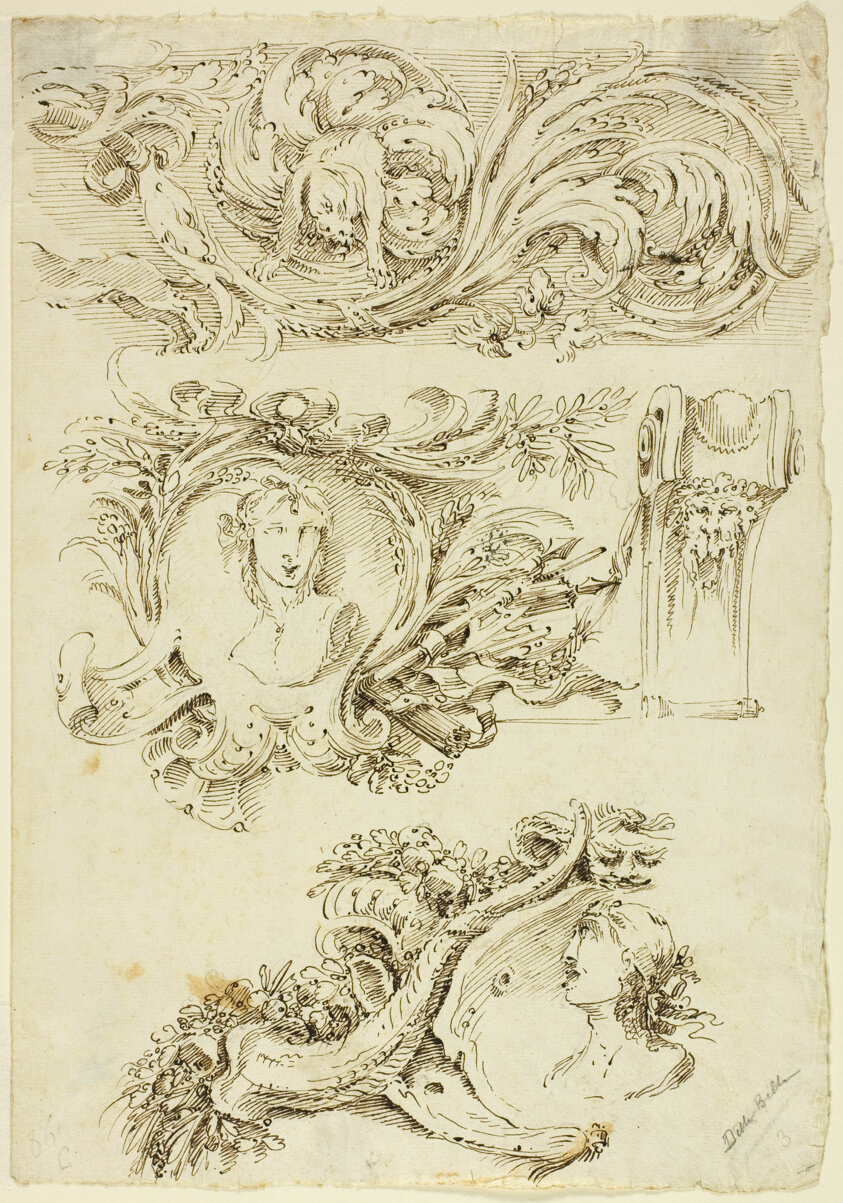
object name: Drawing and Watercolor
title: Street in Bologna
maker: John Ruskin (English, 1819-1900)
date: 1845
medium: Pen and brown ink with brush and gray and brown wash and white gouache over graphite, on gray wove paper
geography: England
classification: pen and ink drawings; drawings (visual works); prints and drawing